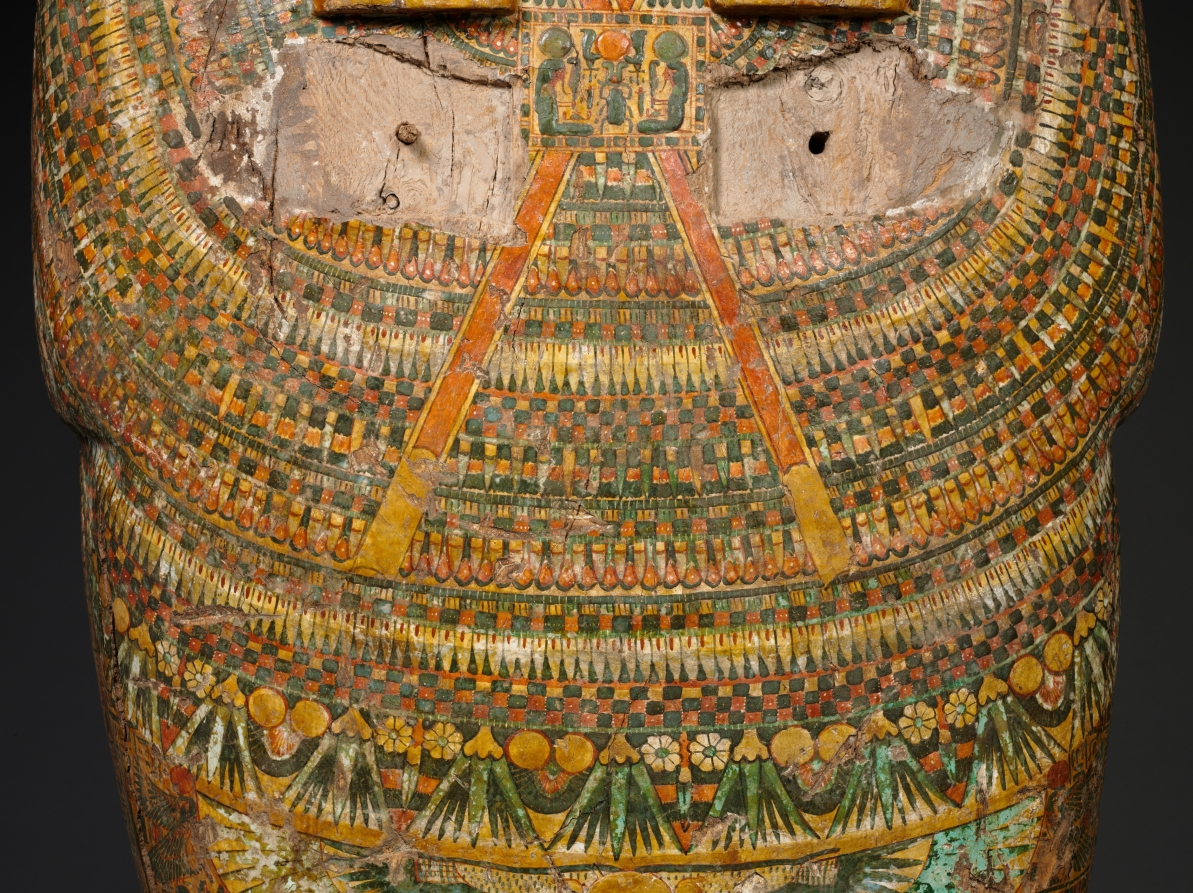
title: Coffin of Nesykhonsu (lid)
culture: Egypt, Third Intermediate (1069–715 BCE), Dynasties 21–22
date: c. 976–889 BCE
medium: gessoed and painted sycamore fig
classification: Funerary Equipment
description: A complete set of coffins during the late New Kingdom and Third Intermediate Period consisted of an outer and inner coffin and a mummy board (essentially a lid without a case, placed directly over the wrapped mummy). Judging by its size, this must have been Nesykhonsu's outer coffin. The type is essentially the same as the coffin of Bakenmut, which was also an outer coffin. The two coffins are said to have been found together and to have belonged to a man and wife. This is quite possible, although the inscriptions do not bear it out. Bakenmut is not mentioned on Nesykhonsu's coffin, nor is she mentioned on his. There was by this time a tremendous repertoire of scenes appropriate for coffin decoration. Whereas Bakenmut's coffin features images of deified dead pharaohs, Nesykhonsu's is decorated in a more personal way with scenes from her own funeral. The main scene in the interior (near the top) shows a priest clad in a panther skin with the mummy of Nesykhonsu behind. The god appears in mummy form and wears a sun disk on his head. The scarab beetle inside the sun disk identifies him as Khepri, the morning sun, and the hieroglyphs to the right identify him as Atum, the evening sun. Taken together, image and text represent the sun god in both his rising and setting, youthful and aged aspects.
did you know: Two of Nesykhonsu's titles, "Lady of the House" and "Singer of the Choir of Mut the Great," are written on the outside of the coffin.